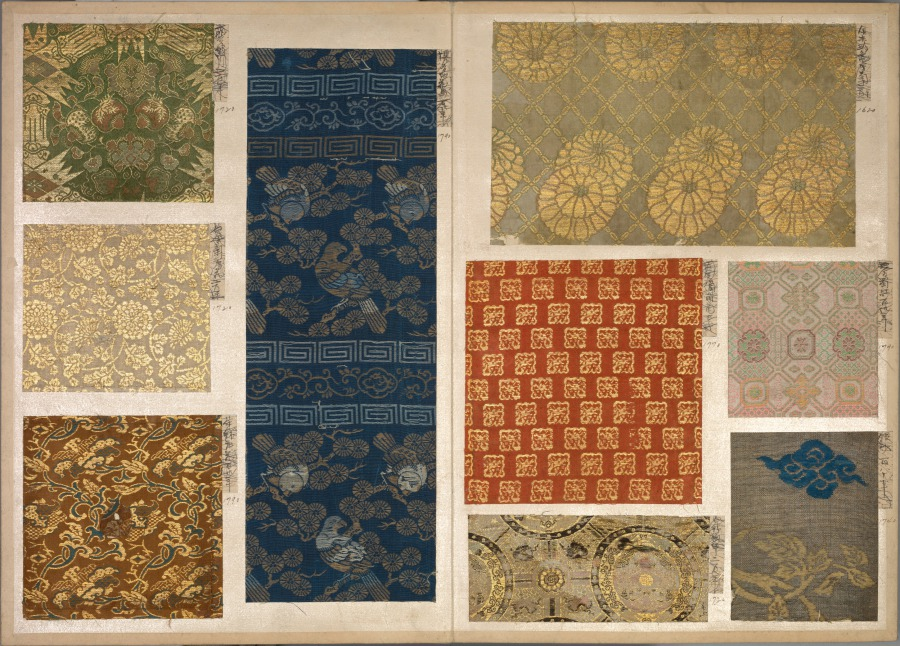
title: Album of Textile Samples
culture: Japan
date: 1790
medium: silk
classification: Textile